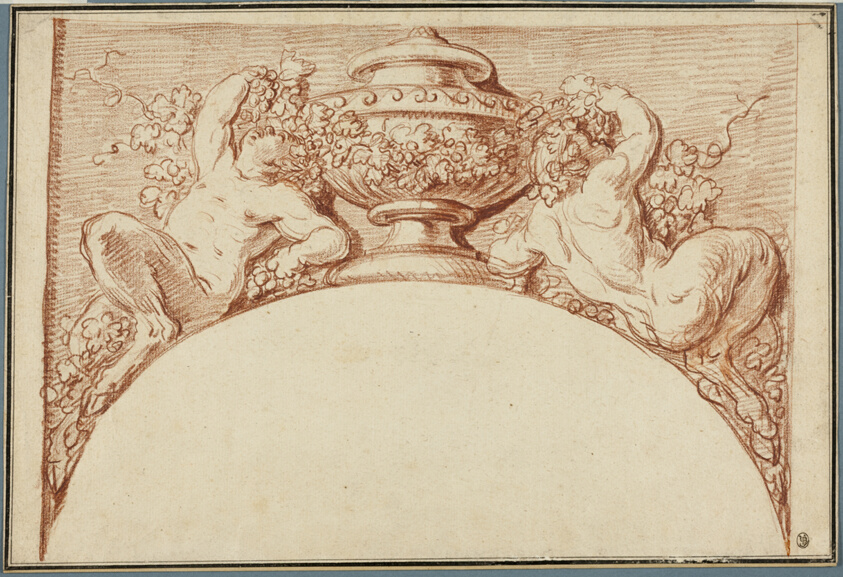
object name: Drawing and Watercolor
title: Design for an Archivolt: Two Fauns Supporting an Urn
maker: Clodion (Claude Michel); French, 1738-1814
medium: Red chalk, on buff laid paper, laid down on cream wove paper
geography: France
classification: drawings (visual works); prints and drawing